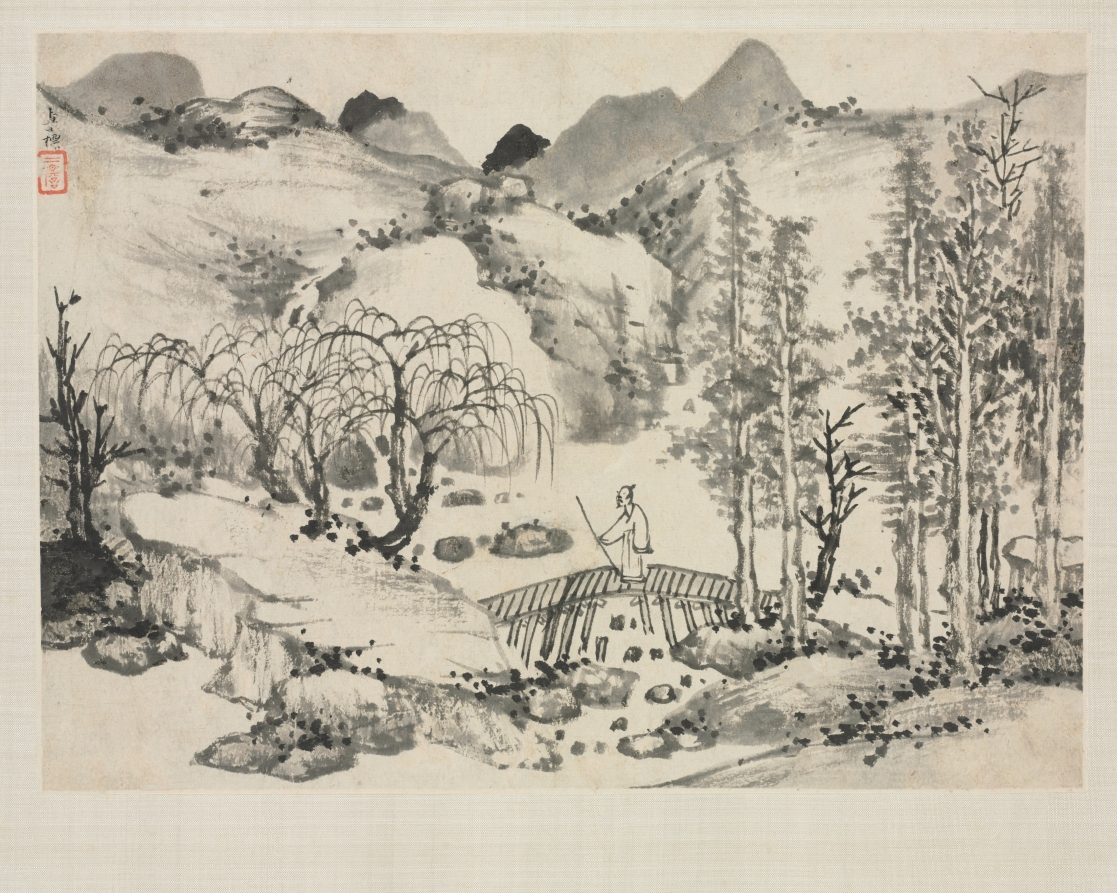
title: Landscape Album in Various Styles: Landscape with Artist on a Bridge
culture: China, Qing dynasty (1644-1911)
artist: Zha Shibiao (Chinese, 1615–1698)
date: 1684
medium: album leaf, ink and light color on paper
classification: Painting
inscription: 查士標 [印] 二瞻